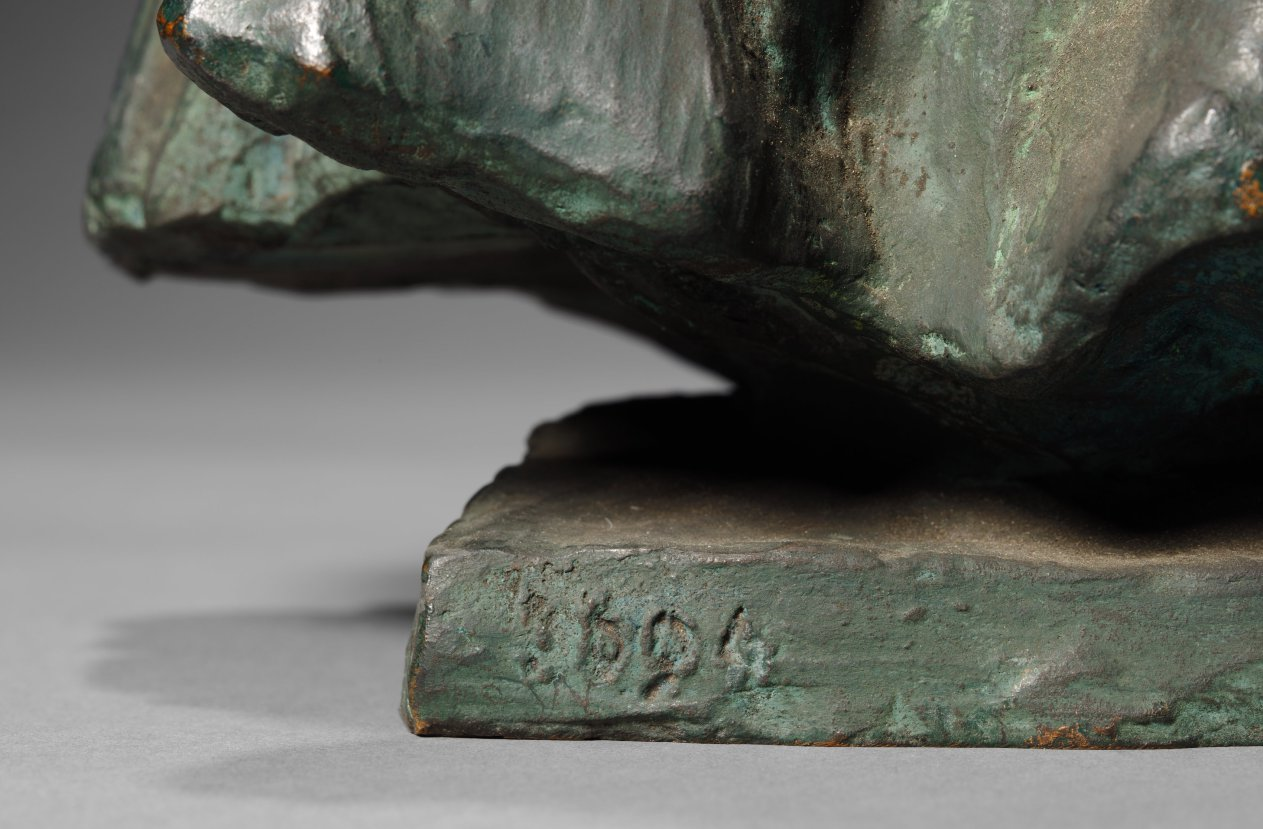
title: Loïe Fuller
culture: France, 19th-20th century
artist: Pierre Roche (French, 1855–1922)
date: c. 1900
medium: bronze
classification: Sculpture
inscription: Inscribed on the face of the base: "Loïe Fuller" and at the right, signature of the artist